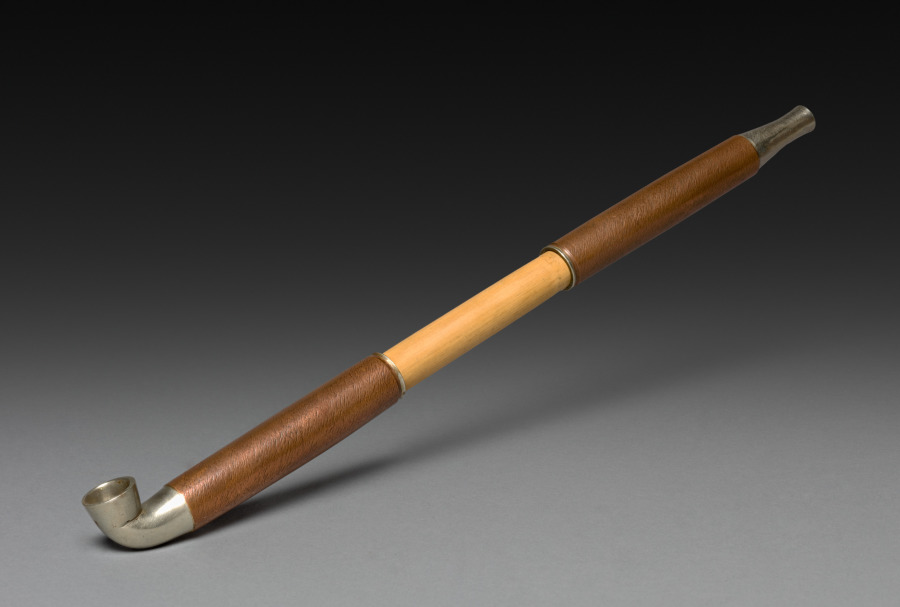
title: Tobacco Pipe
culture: Japan, Edo period (1615–1868) to Meiji period (1868–1912)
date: 1800s–early 1900s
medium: bamboo and metal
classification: Miscellaneous